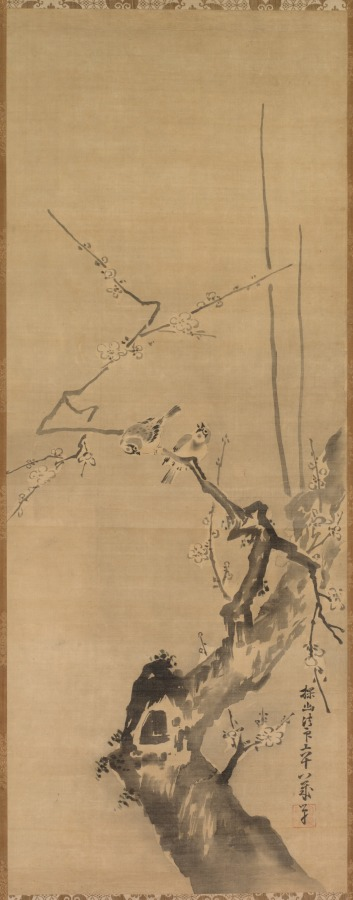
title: Sparrows on Blossoming Plum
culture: Japan, Edo period (1615–1868)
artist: attributed to Kano Tan’yū (Japanese, 1602–1674)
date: 1661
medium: One of a triptych of hanging scrolls; ink and slight color on silk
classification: Painting